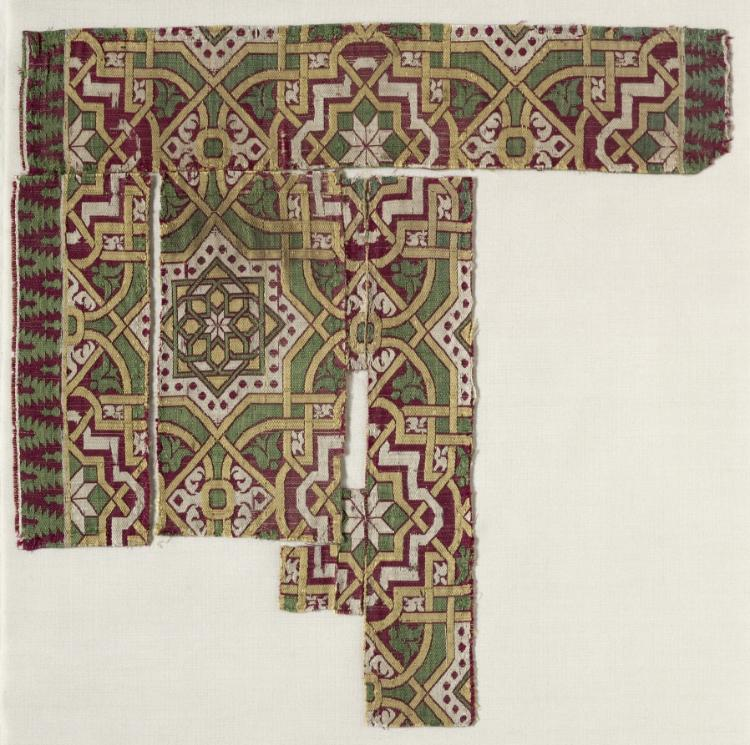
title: Silk Fragment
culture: Spain, Islamic period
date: 14th-15th century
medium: lampas weave, silk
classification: Textile